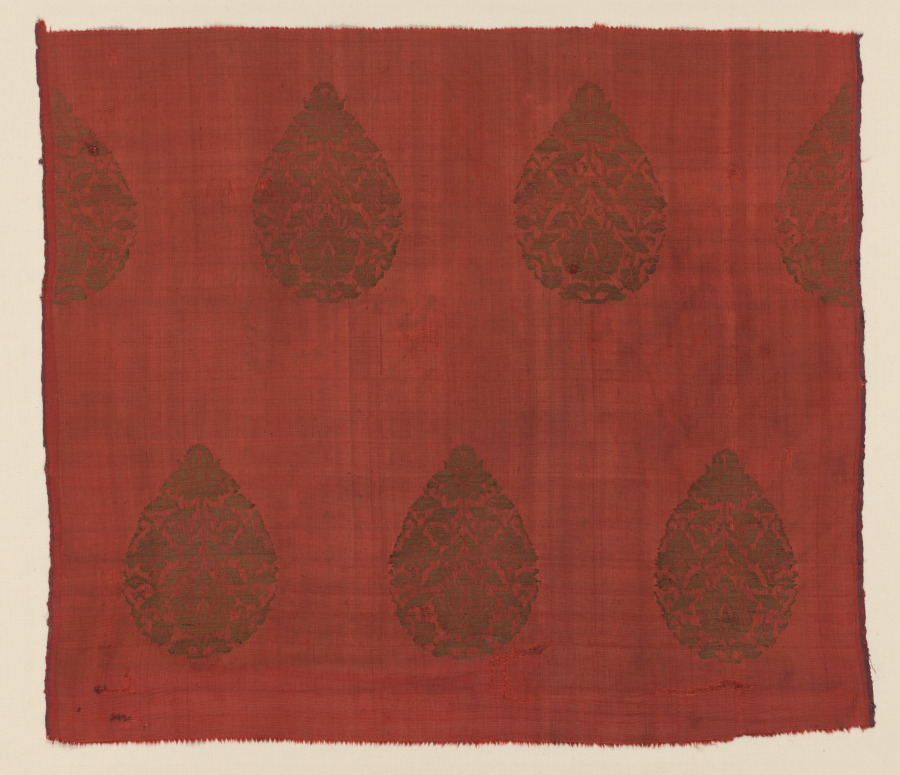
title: Brocade with Lotus Flowers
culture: Northern China, Yuan dynasty (1271-1368)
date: 1200s–mid-1300s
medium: Silk: tabby, brocaded; gold thread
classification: Textile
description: The tradition of brocade weaving in northern China continued after the Mongol conquest. However, the arrival of eastern Iranian craftsmen affected both the design and the structure of the brocades: patterns became symmetrical and paired warps replaced single warps. Both of these modifications can be observed in this example. At the same time, however, the Jin tradition of floating foundation wefts across the back sides of the brocaded areas continued. Brocades such as this may have been woven in Hongzhou (in Hebei province), where weavers from both western Asia and from the former Jin capital, Bianjing, are known to have worked together.